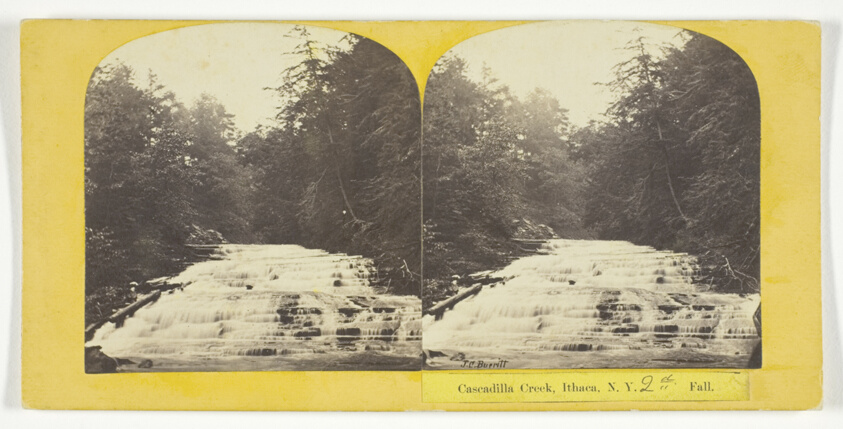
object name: Photograph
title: Cascadilla Creek, Ithaca, N.Y. 2nd Fall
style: 19th century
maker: J. C. Burritt; American, active 1860s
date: 1860/65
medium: Albumen print, stereo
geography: Ithaca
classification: photography; photograph; albumen silver print; stereograph (albumen)